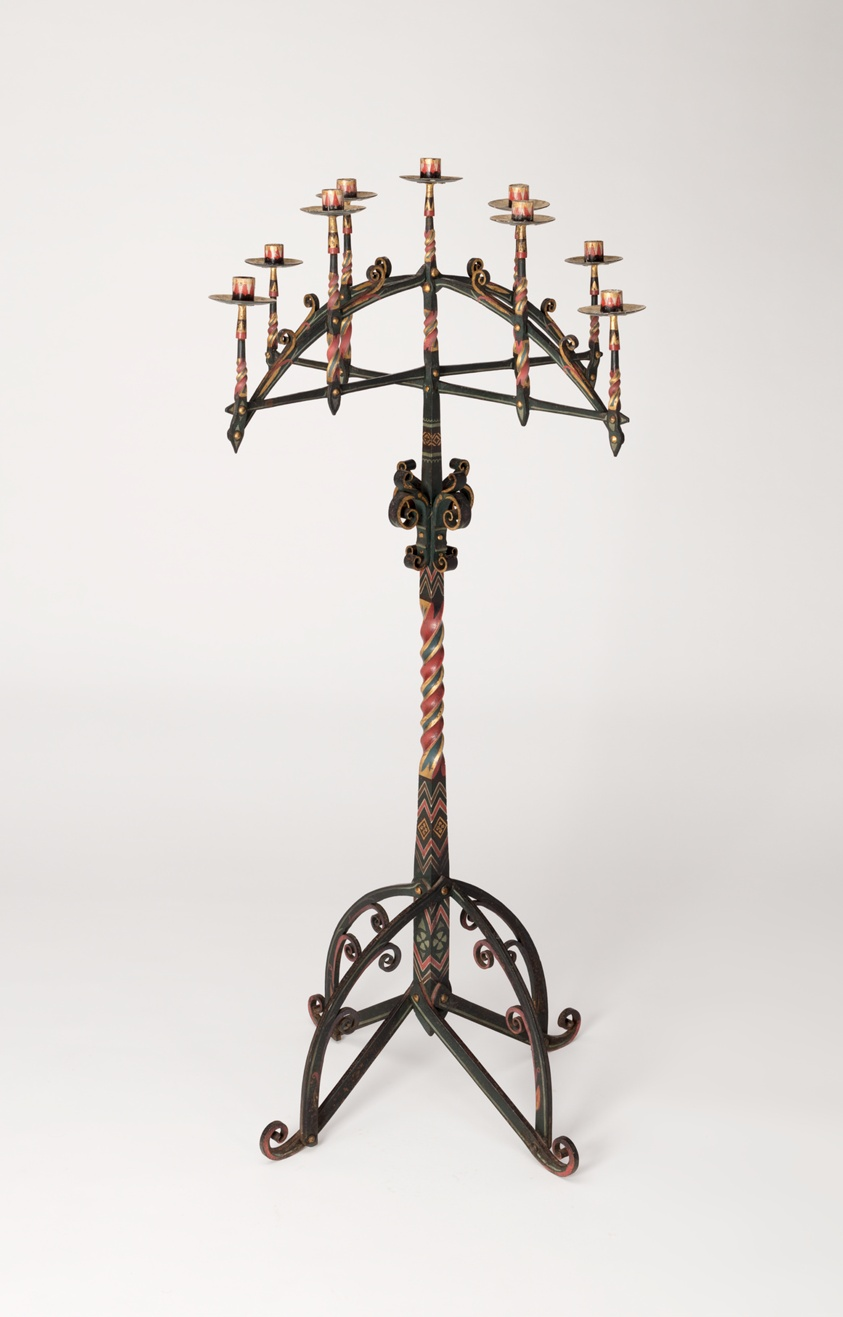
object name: Metalwork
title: Candelabra (One of a Pair)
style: gothic revival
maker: William White (English, 1825-1900)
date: c. 1860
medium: Painted bronze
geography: England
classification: candleholder - candelabra; candleholder; metalwork